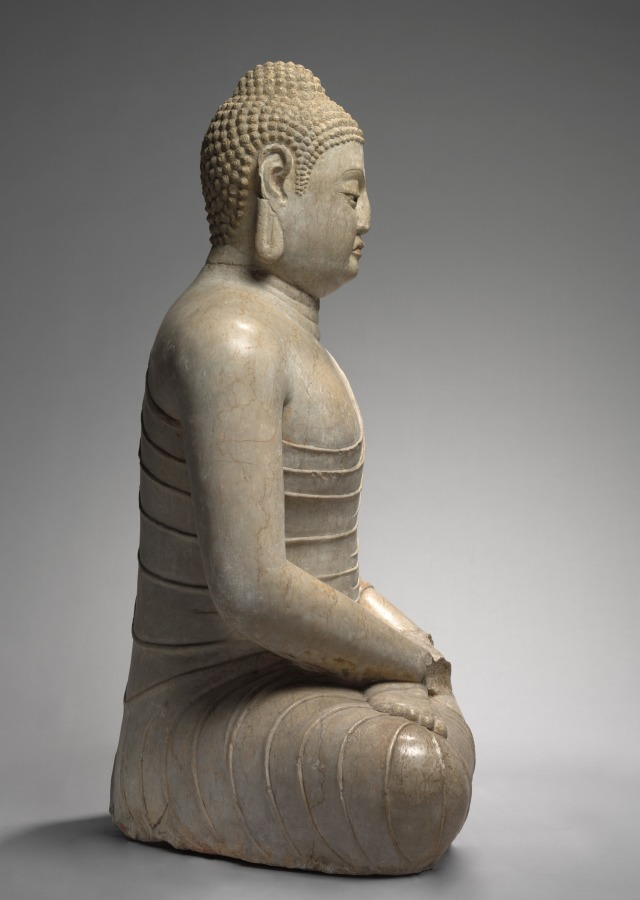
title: Seated Amitayus Buddha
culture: China, Northern Qi dynasty (550-577)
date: c. 570s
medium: marble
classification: Sculpture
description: Amitayus, the Buddha of Infinite Life, is seated in meditation on a double lotus pedestal. The pedestal was not made with the statue but the combination is faithful to the original artistic conception. The statue is an extremely rare example of a major type of Northern Qi Buddhist sculpture. The heavy, massive front highlights the sense of monumentality and the spiritual essence of the Buddha. Today the sculpture is united with a pedestal that exhibits the rich, ornate style of early Tang sculpture. It was commissioned by the Duke of Liang, Fang Xuanling (578–648), for the blessing of his second son and daughter-in-law, the Tang imperial princess of Gaoyang. The iconography and inscription suggest that it originally went with a statue, now missing, of Shakyamuni, the historical Buddha, instead of Amitayus.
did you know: The stringlike folds of the Buddha's draperies emphasize his monumental, rigidly erect torso and tubular limbs.